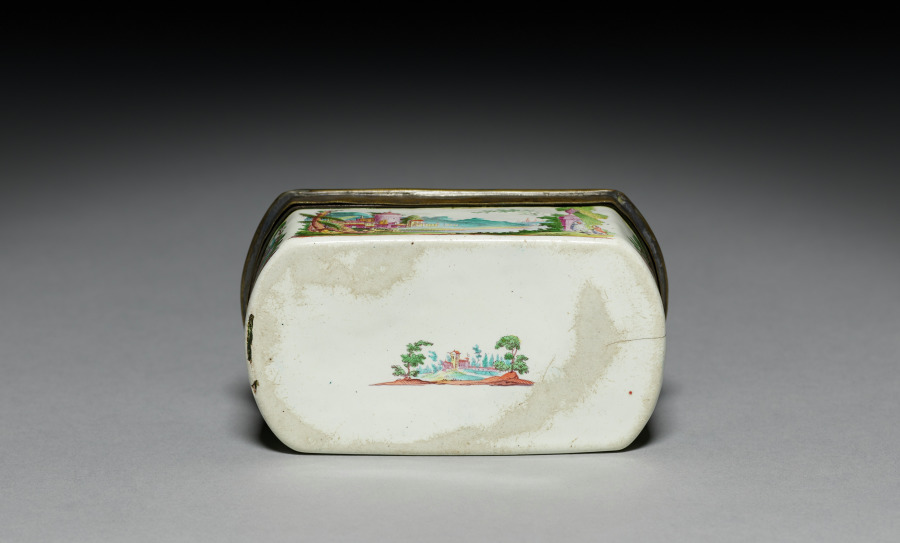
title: Snuff Box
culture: Austria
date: mid-1700s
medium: enamel on copper with metal mounts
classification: Miscellaneous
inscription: on interior of lid in a rococo cartouche: "S Hieronimus."